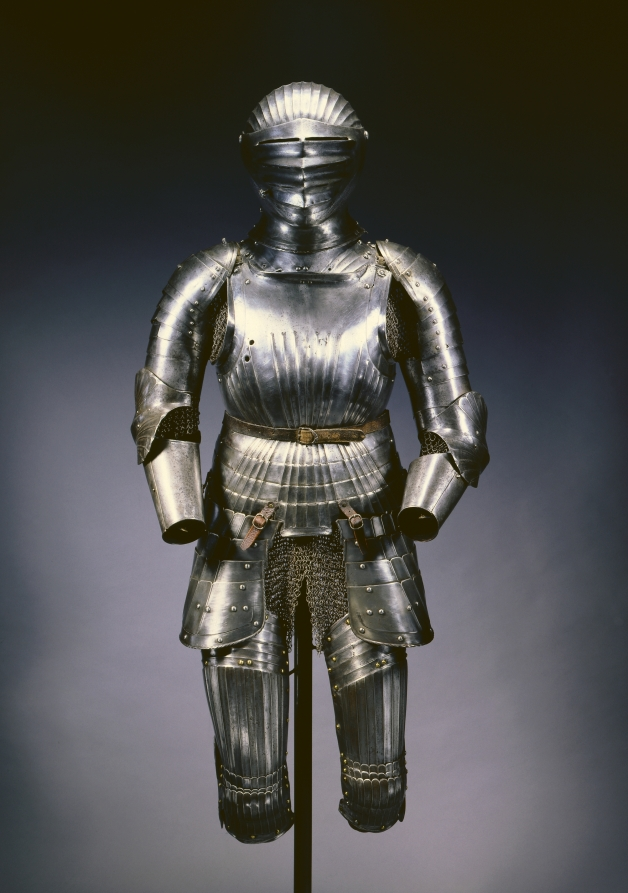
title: Partial Suit of Armor in Maximilian Style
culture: Germany, Nuremberg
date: c. 1525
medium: steel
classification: Arms and Armor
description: This fluted armor was visually striking in natural sunlight, which created a dazzling effect as it reflected off the polished, rippling steel. The flutings may have originated as a means of imitating the pleatings of male costume of the day. It became apparent, however, that the flutings were also a strengthening device, similar to corrugated metal. This enabled the armorer to use plates of thinner—and therefore lighter—steel. Such suits of armor demanded time-consuming and highly precise work from the armorer, which in turn quickly drove the production costs high enough that the fashion disappeared by 1540.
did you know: The style's name is derived from Maximilian I, Holy Roman Emperor, during whose reign this was popular.